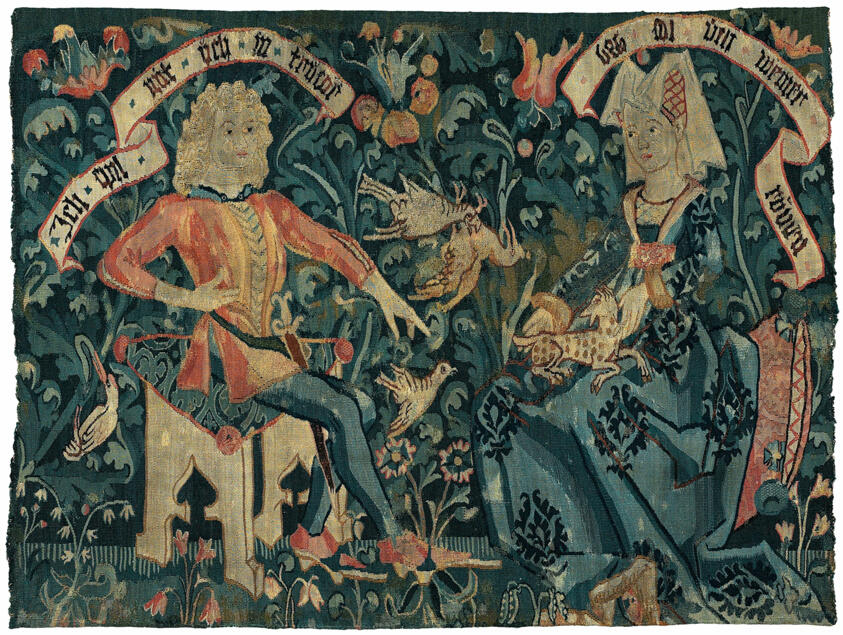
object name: Coverings and Hangings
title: The Lovers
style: medieval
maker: Basel (present-day Switzerland)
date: 1490/1500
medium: Hemp, wool and silk, slit and double interlocking tapestry weave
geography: Basel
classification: weaving - tapestry; tapestry; textile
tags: women, men